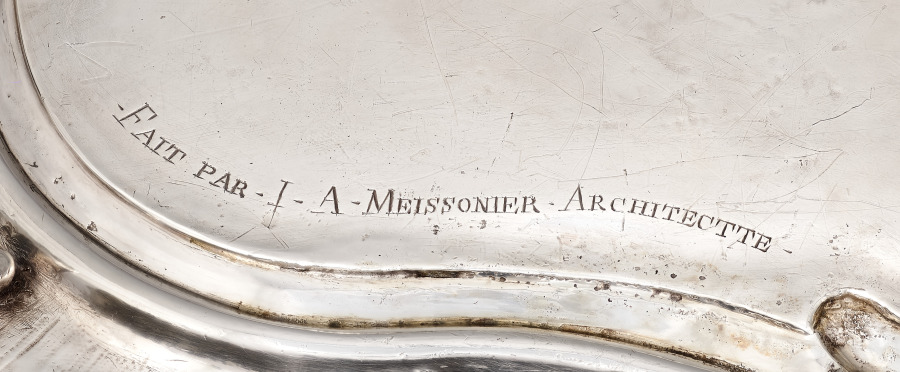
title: Stand for a Covered Tureen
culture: France, Paris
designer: Juste-Aurèle Meissonnier (French, 1695–1750)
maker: Pierre-François Bonnestrenne (French)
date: 1735–38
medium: silver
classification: Silver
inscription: engraved Meissonnier signature.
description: See entry for cover record 1977.182.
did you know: The langoustine, pigeon, and vegetables were cast using real examples giving the silver copies lifelike detail and appearance.